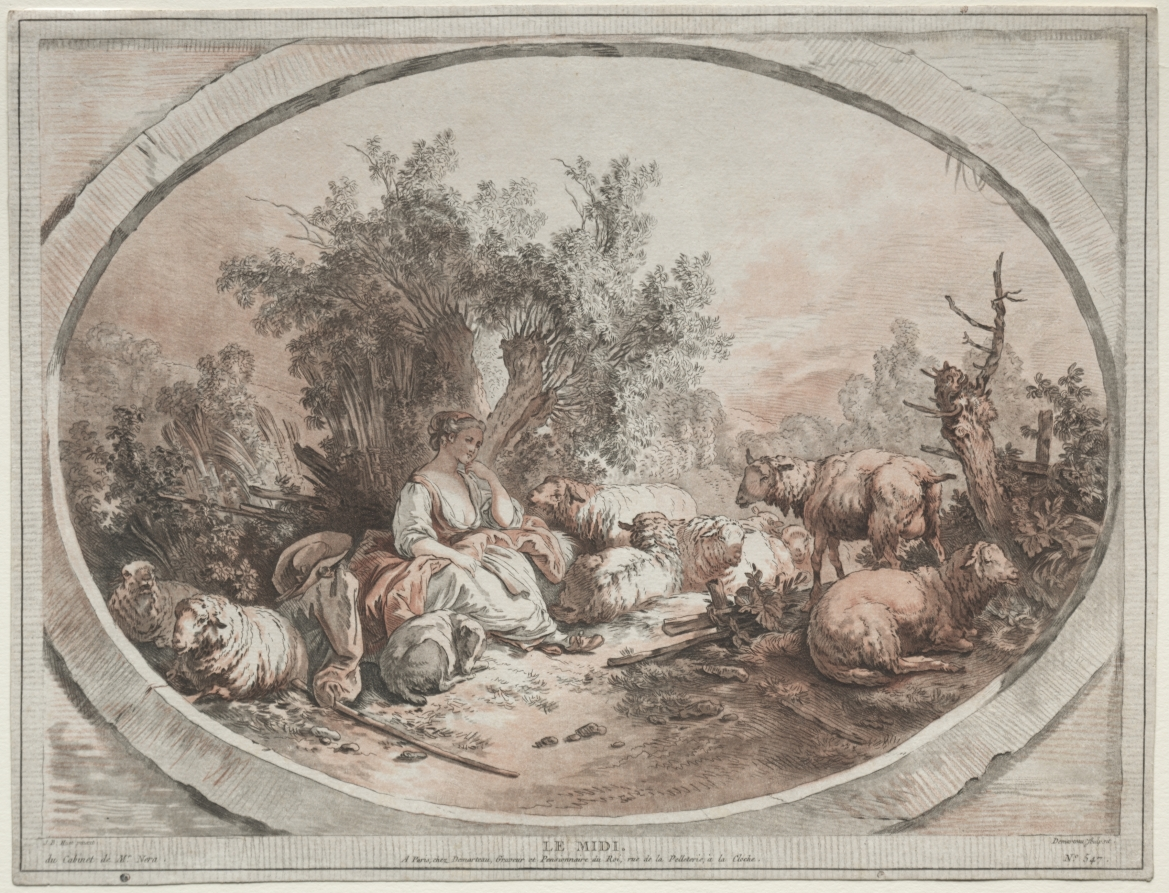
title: Noon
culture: France, 18th century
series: The Four Times of Day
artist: Gilles Demarteau (French, 1722–1776)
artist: after Jean-Baptiste Marie Hüet (French, 1745–1811)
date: c. 1776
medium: chalk-manner etching and engraving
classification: Print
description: Scenes representing times of day or the seasons were frequently used to thematically decorate rooms, and were suitable subjects for suites of prints. This example depicting a young shepherdess avoiding the noonday sun is from a set that also features Morning, Afternoon, and Evening. Each scene portrays the bucolic life of a shepherd or shepherdess in a rural landscape. Demarteau colored the prints to appear like drawings made with black and red chalk with wash, similar to Boucher’s The Departure of Jacob nearby.